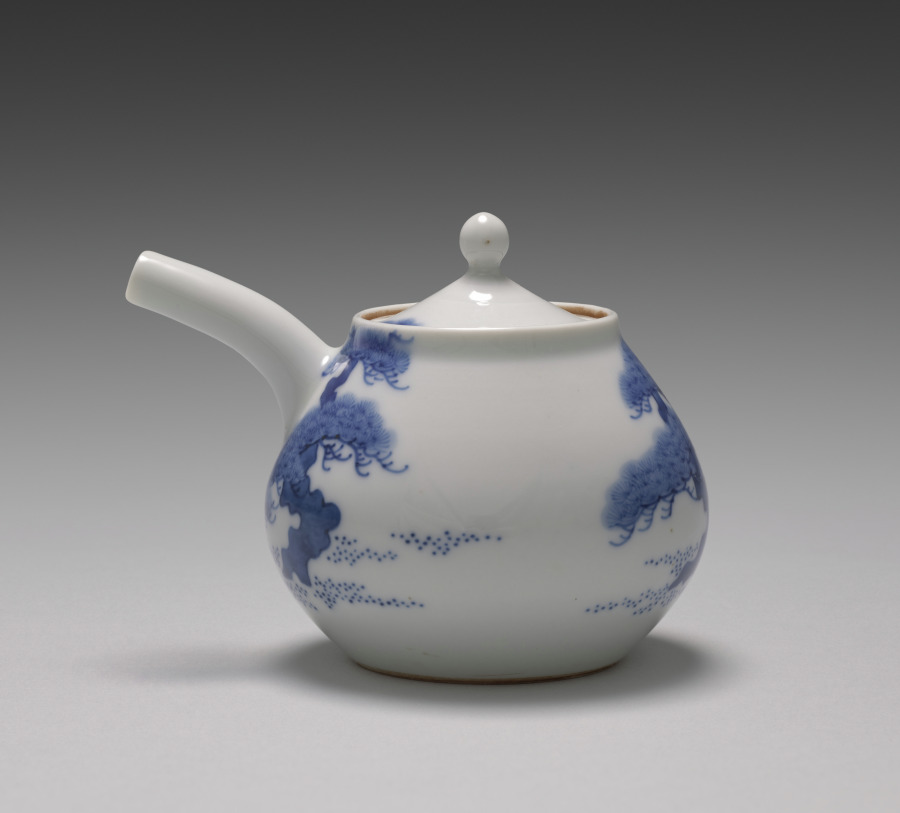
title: Teapot with Pines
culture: Japan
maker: Seifū Yohei III (Japanese, 1851–1914)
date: 1893–1914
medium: Porcelain with underglaze blue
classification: Ceramic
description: Side-handled teapots known as kyūsu and hot water coolers, or yuzamashi, are essential components of sencha tea sets. The teapot is, of course, meant for steeping and serving the tea. Yuzamashi are used to cool boiled water to the ideal temperature for the type of tea to be brewed. This teapot has a pine in underglaze blue on each side. The tip of one of these pines reaches onto the tiny lid, and as with the trees on the Water Cooler with Pines, CMA 2022.163, the trunks are curvy ribbons with little definition. Considering the execution of the two vessels' designs, one might imagine the pot and cooler to have been part of the same set.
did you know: This teapot with images of pines are among Seifū Yohei III’s designs painted in blue.